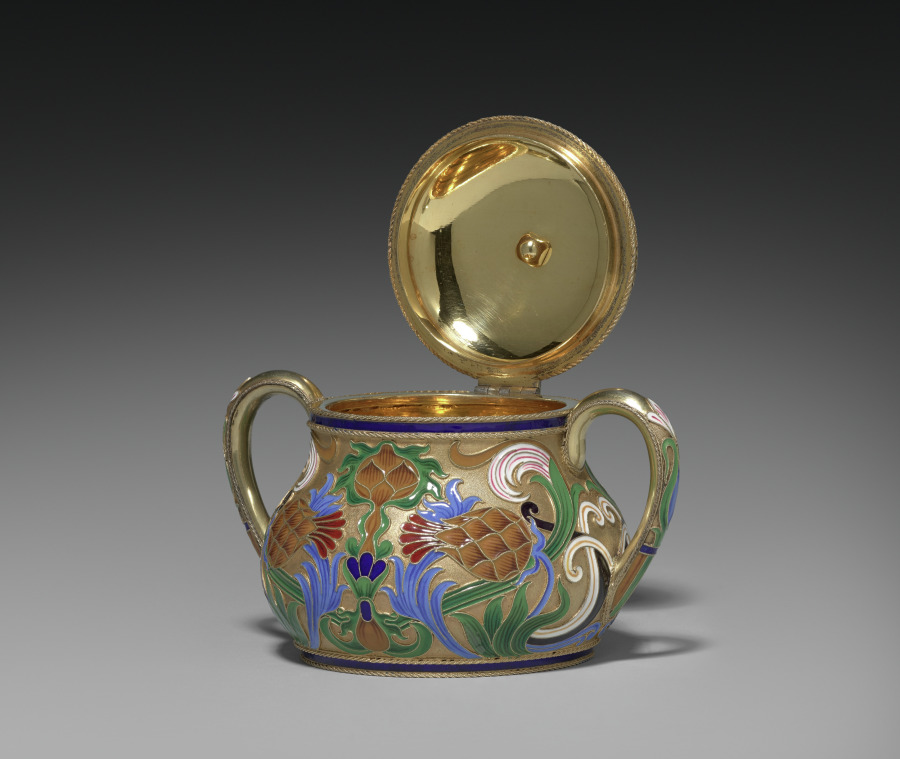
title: Covered Sugar Bowl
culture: Russia, St. Petersburg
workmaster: attributed to Feodor Ivanovich Rückert (Russian, 1840–1917)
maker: House of Fabergé (Russian, 1842–1918)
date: 1887–96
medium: silver gilt, opaque cloisonné enamel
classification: Miscellaneous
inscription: 84, St. George [assay mark for Moscow, 1882-1896]; C. Fabergé (in Cyrillic); double-headed eagle [imperial warrant]; St. George?; initials of Carl Fabergé (in Cyrillic); 10593 scratched.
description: Fabergé’s craftsmen in Moscow, especially under the watchful eye of workmaster Feodor Rückert, became known for their work in the pan-Slavic or neo-Russian style, hearkening back to 17th-century motifs of Russian folk art. Often on rather conventional shapes, Rückert and his silversmiths created an explosion of color, achieved through the historic technique of cloisonné enamel in which tiny metal lines are soldered to the surface then filled with glass powders in various colors and fired to create a high gloss finish. The result is a spectacular evocation of the 17th-century originals. Far from mere copies, however, Rückert's designs, such as this tea service, employ naturalistic or abstract motifs in a thoroughly modern adaptation of a remarkable earlier period of Russian art and decoration.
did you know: This covered sugar bowl is part of a larger tea service.